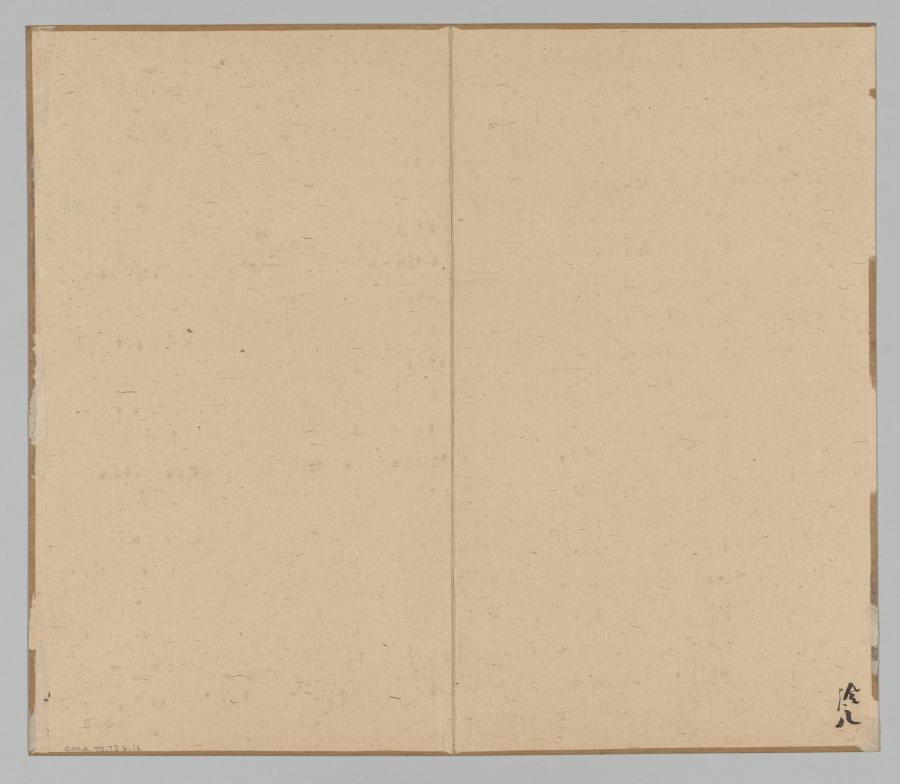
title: Reverberations of Taiga, Volume 2 (leaf 16)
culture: Japan, Edo period (1615–1868)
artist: Aoki Shukuya (Japanese, d. 1802)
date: mid- to late 1700s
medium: double-leaf from a pair of albums; ink and light color on paper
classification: Portfolio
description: Traditionally, young painters in Japan began their studies with an established master-painter. The master's compositions invariably became models that the apprentice copied to learn various ink and brush techniques. Shukuya was a pupil of the famous Kyoto artist Ikeno Taiga, whose style is reflected in these sketches of rocks, trees, and mountains.